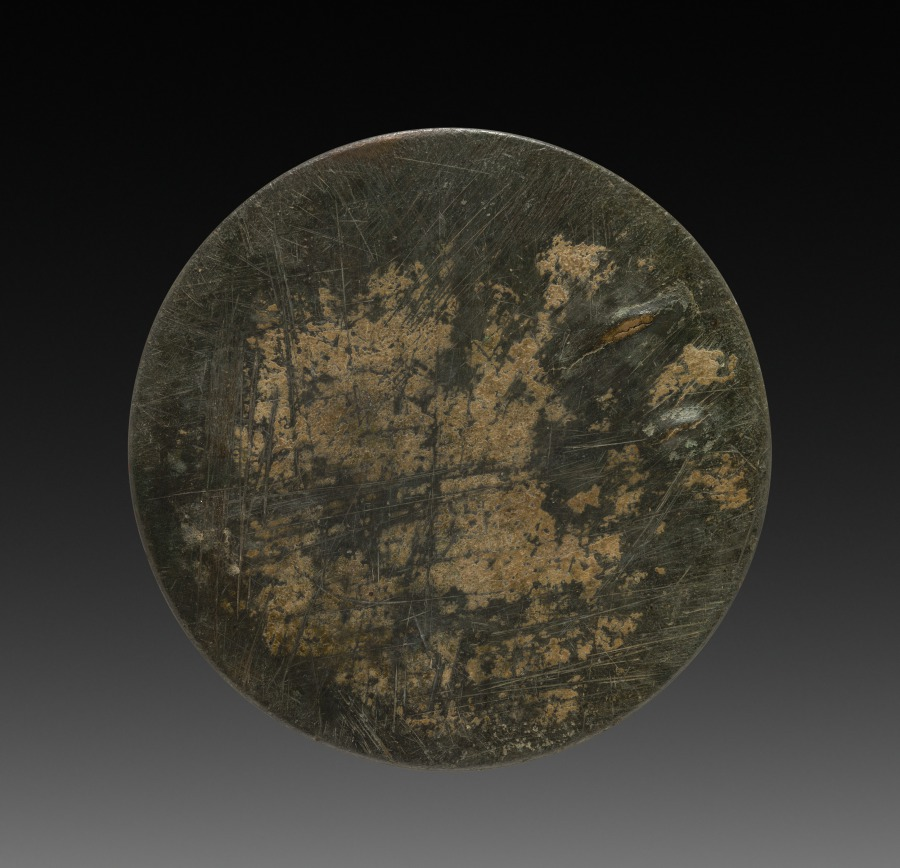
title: Mirror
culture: Japan, Heian period (794–1185)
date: 794–1185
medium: bronze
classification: Metalwork